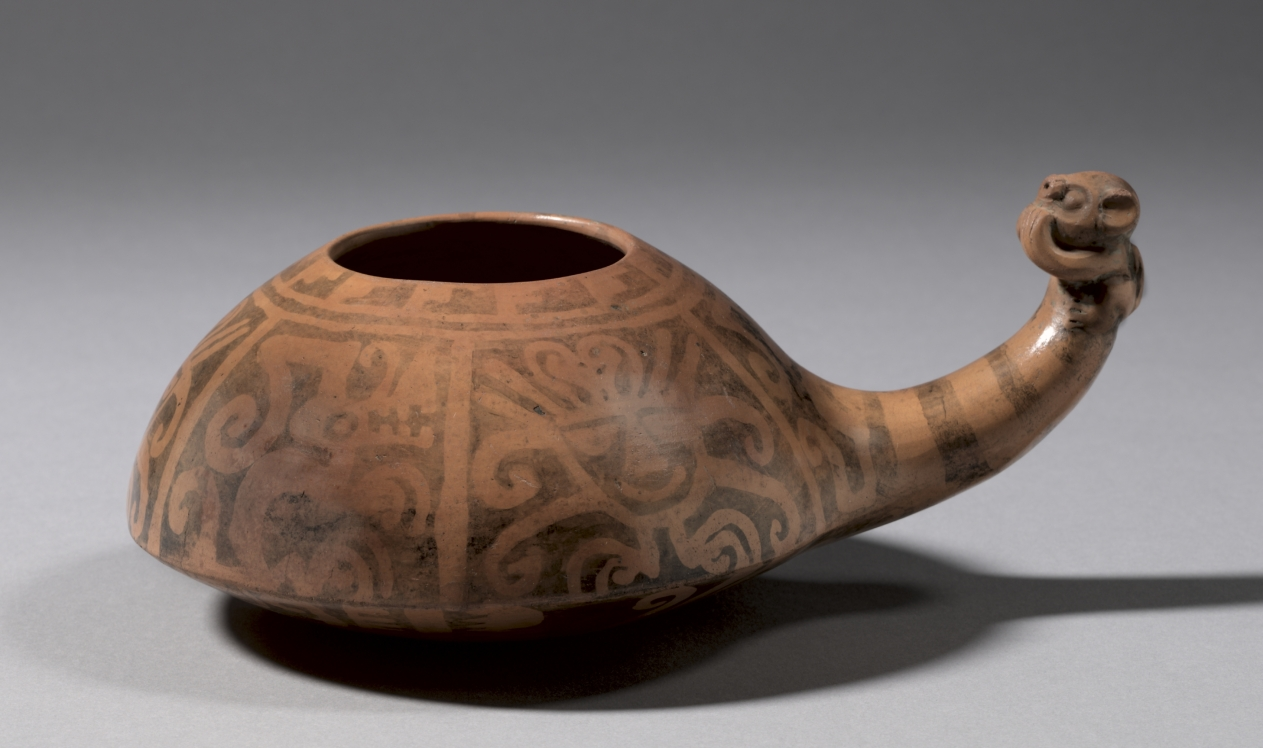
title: Dipper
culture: Peru, North Highlands, Recuay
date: 100 BCE–700 CE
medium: ceramic, slip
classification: Ceramic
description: Both of these objects feature a creature known as the "Recuay feline," although it could also refer to a fox, dog, or viscacha (a rodent). Whatever its identity, the prominent crest on its head ties it to the supernatural realm, a connection underlined by the deity head that also appears on the dipper and by the ritual function of snuff tablets, which were used to inhale hallucinogenic snuffs during religious ceremonies.